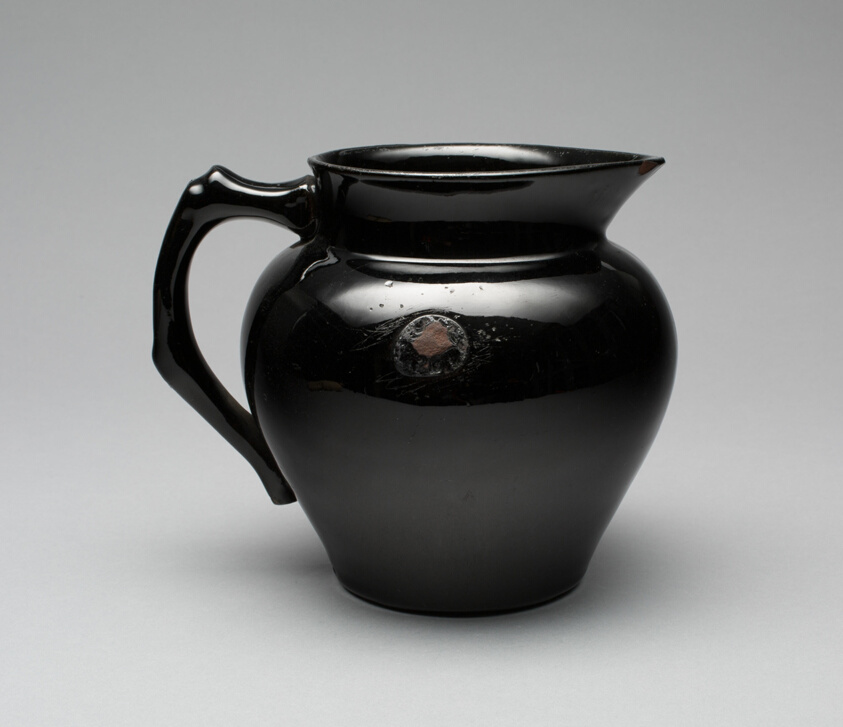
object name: Decorative Arts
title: Pitcher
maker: Artist unknown (American, 19th century); East coast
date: 1800–30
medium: Earthenware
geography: United States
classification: pitcher (vessel); vessel; american decorative arts; american arts; ceramics; decorative arts